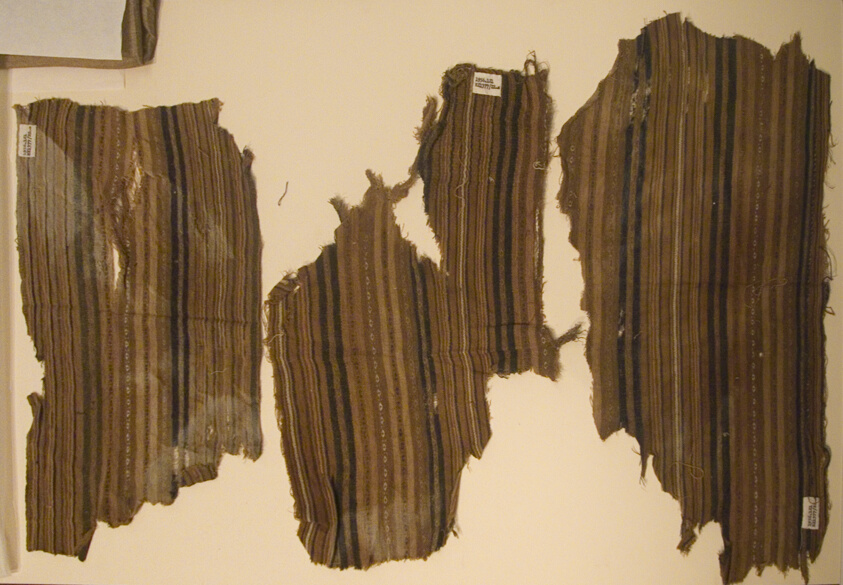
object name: Textile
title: Fragments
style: chancay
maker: Possibly Chancay; Peru, Possibly central coast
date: A.D. 1000/1476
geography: Peru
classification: textile; weaving